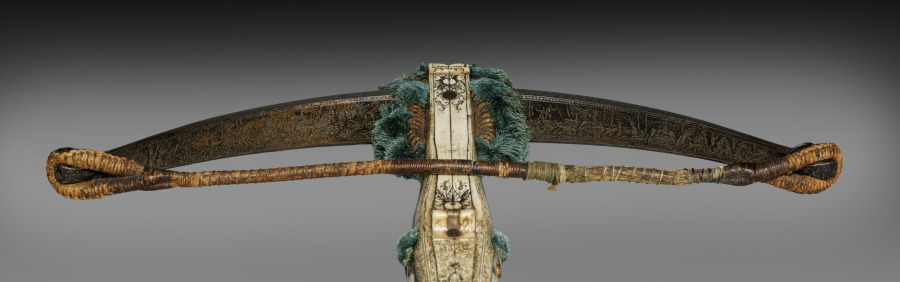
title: Crossbow of Elector Augustus I of Saxony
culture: Germany, Saxony, 16th century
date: c. 1553–73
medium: wood (walnut?), bone veneers, flax cord, steel (etched, traces of gilding). woolen pompoms, stock decorated wih inlaid trophies of arms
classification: Arms and Armor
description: This crossbow was a hunting weapon for Prince Elector Augustus I, a member of the ruling elite in the Holy Roman Empire. Augustus, powerful and wealthy, had even the most practical instruments ornately decorated, including this crossbow and its cranequin, or winding device.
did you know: Augustus was a marksman who took part in crossbow competitions. He had a large collection and often gave them to friends.